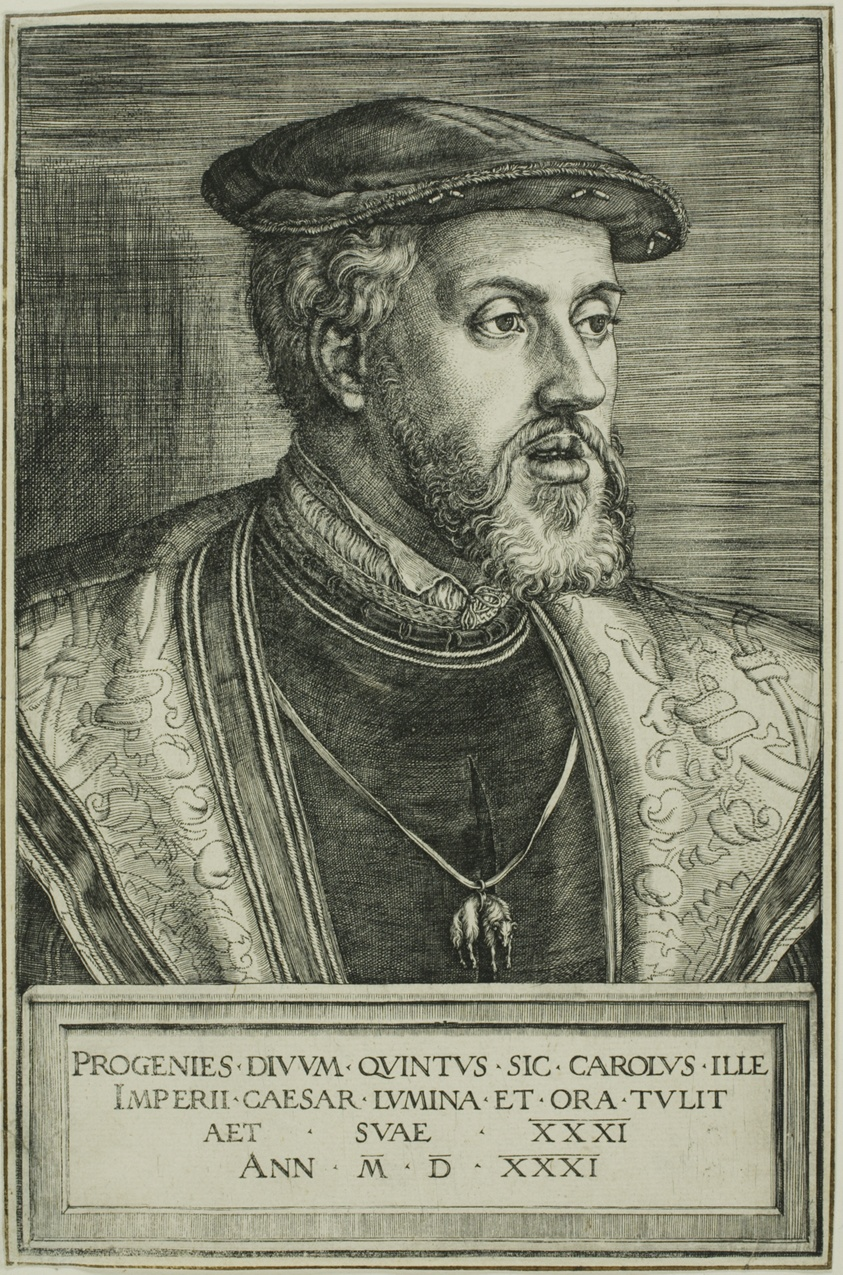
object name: Print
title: Emperor Charles V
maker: Barthel Beham (German, 1502-1540)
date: 1531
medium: Engraving in black on ivory laid paper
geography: Germany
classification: engraving; print; prints and drawing